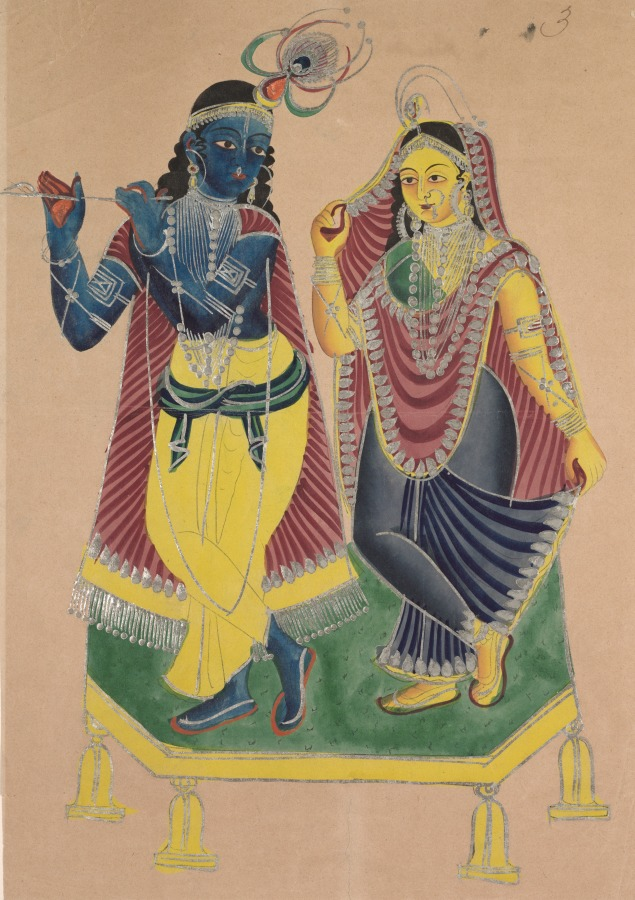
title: Radha and Krishna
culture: Eastern India, Bengal, Kolkata, Kalighat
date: c. 1890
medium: Gum tempera, graphite, ink, and tin on paper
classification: Painting